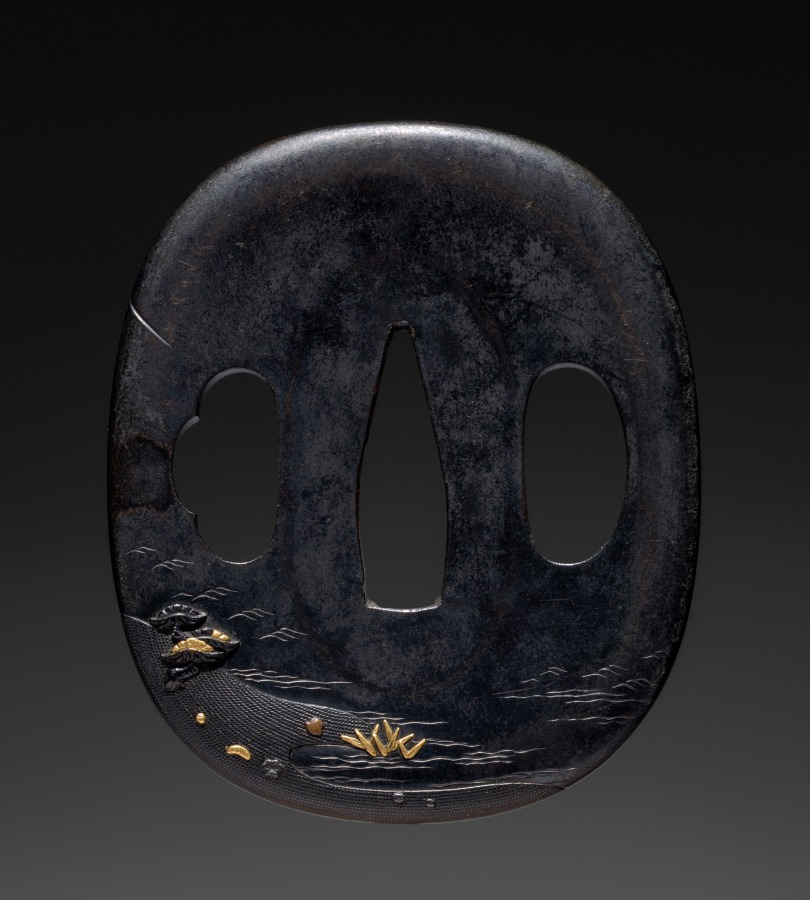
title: Sword Guard (Tsuba) with Mt. Fuji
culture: Japan, Edo period (1615–1868)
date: mid-1800s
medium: iron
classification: Arms and Armor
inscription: Signature: Morichika with seal